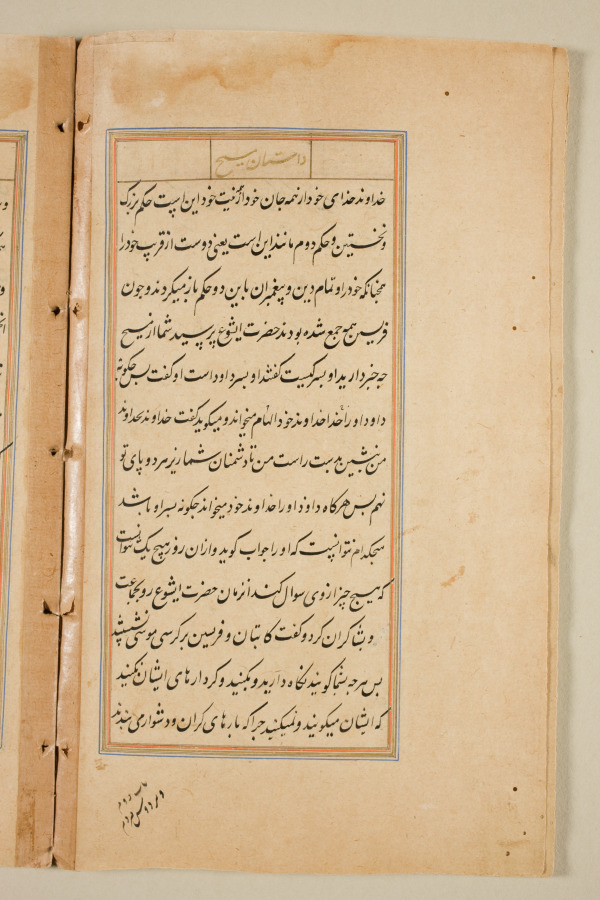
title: Text page from a Mirror of Holiness (Mir’at al-quds) of Father Jerome Xavier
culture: Mughal India, Allahabad, made for Prince Salim (1569–1627)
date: 1602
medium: Ink and gold on paper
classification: Manuscript